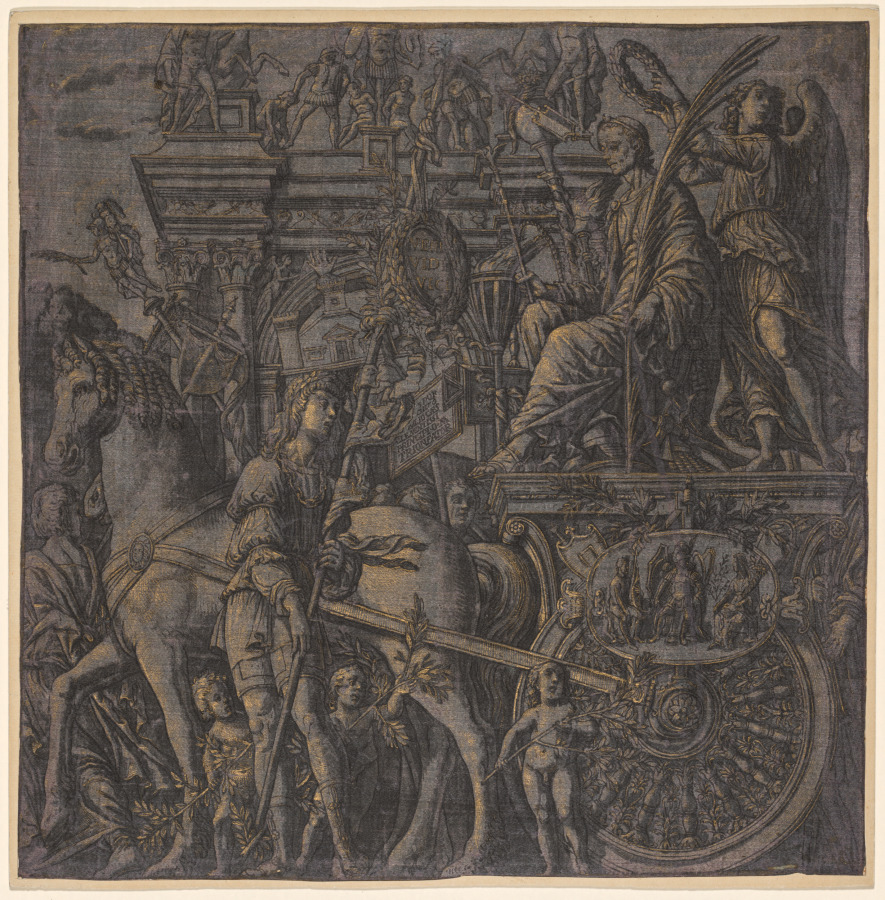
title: The Triumph of Julius Caesar: Caesar Triumphant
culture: Italy, 16th century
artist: Andrea Andreani (Italian, about 1558–1610)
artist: after Andrea Mantegna (Italian, about 1431–1506)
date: 1593–99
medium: woodcut printed on silk, heightened by hand with gold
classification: Print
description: Commissioned by Duke Vincenzo Gonzaga, this series of chiaroscuro woodcuts reproduces Andrea Mantegna’s Triumph of Julius Caesar, painted a century earlier. The scenes imaginatively portray the triumphal procession of the renowned Roman general and consul Julius Caesar following his successful defeat of Gaul in 52 BC. Each section of the continuous frieze shows elements typical of these parades, sanctioned by the Roman Senate and described in ancient texts. The printed suite’s frontispiece features a portrait bust of Mantegna, and the text below boasts that the famous paintings attracted many viewers. People who owned sets of these woodcuts often tacked them up to create a decorative frieze. Andreani issued the prints with a sheet of classical columns that could be cut out and placed between the scenes. Two fragments of these columns, colored orange, still flank the fourth scene. This special impression of the final woodcut in Andreani’s Triumph of Julius Caesar was printed on dyed silk. The gold highlights, added by hand, make Caesar in his triumphal car appear especially luxurious. In their descriptions of Roman triumphs, the ancient chroniclers Plutarch and Appian each wrote that the hero of honor wore purple robes decorated with gold.